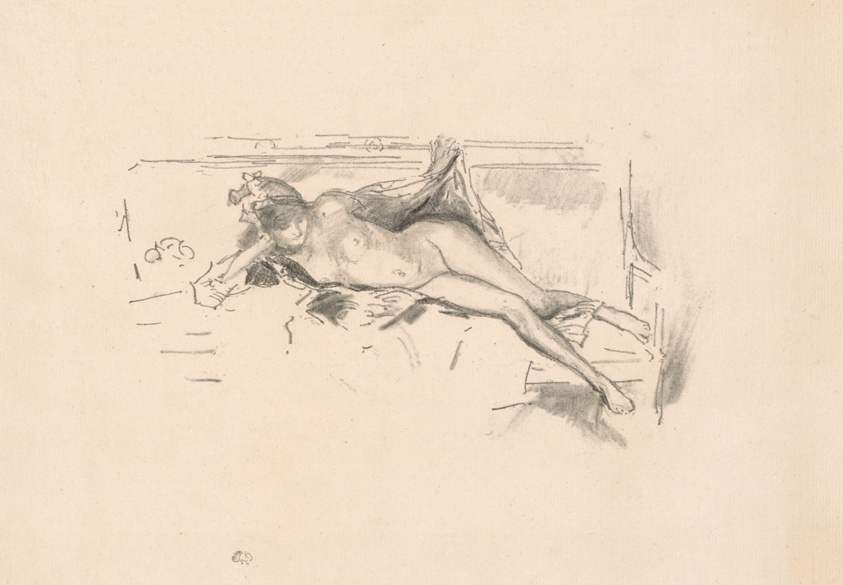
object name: Print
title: Nude Model, Reclining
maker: James McNeill Whistler (American, 1834-1903)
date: 1893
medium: Transfer lithograph in black, with stumping, on ivory laid paper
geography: United States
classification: transfer lithograph; lithograph; print; prints and drawing; paper